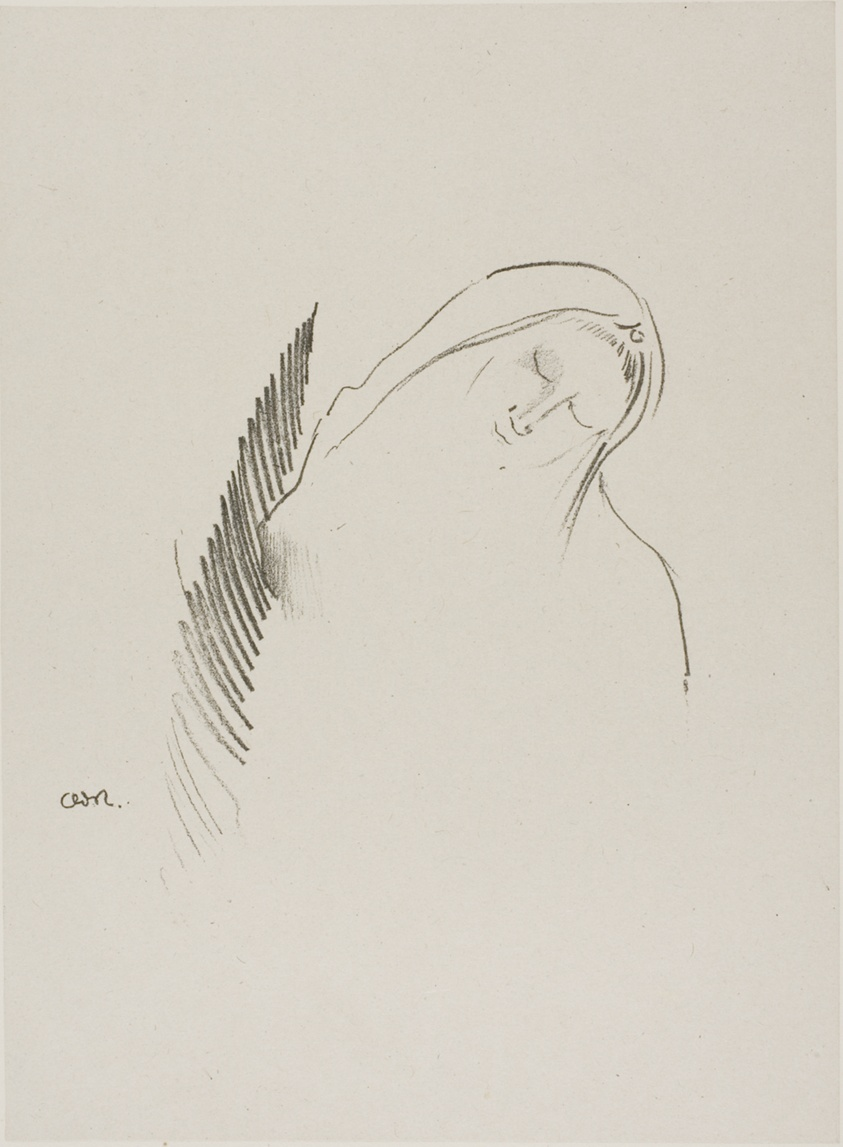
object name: Print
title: Sleep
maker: Odilon Redon (French, 1840-1916)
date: 1898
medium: Lithograph in black on light gray China paper laid down on ivory wove paper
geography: France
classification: lithograph; print; prints and drawing; paper